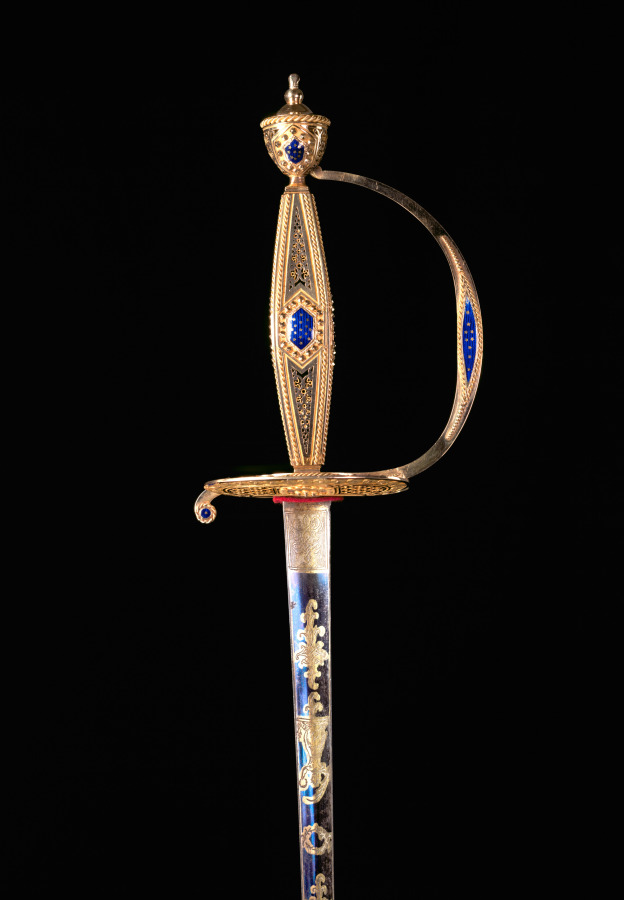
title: Small-Sword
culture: Switzerland, Geneva(?) (blade: Germany, Solingen, early 18th c.), late 18th Century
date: c. 1790–1800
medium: hilt: gold with blue translucent enamel; blade: etched, blued and gilded steel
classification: Arms and Armor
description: This example shows the small-sword at its latest and most refined stage of development. Though highly reflective of French taste, it was probably fashioned in a Swiss workshop under French influence or by a French craftsman working in Switzerland. Worn publicly as an emblem of social rank, this sword was likely custom-made for an affluent individual to use on formal or court occasions. So-called because of its short blade, the small-sword emerged as the light and quick weapon of choice for aristocratic civilians during the 1700s. Such a sword was traditionally suspended at about mid-thigh from the left side of a belt, the hilt exposed through the opening of the gentleman's coat. Highly visible, the hilt invited lavish decoration through precious materials such as gold and enamels, as seen here. Considered a type of masculine jewelry at that time, small-swords featured a variety of hilt styles that went in and out of fashion. Many were decorated to match personal costume, and jewelers worked on the finest small-swords of the day.